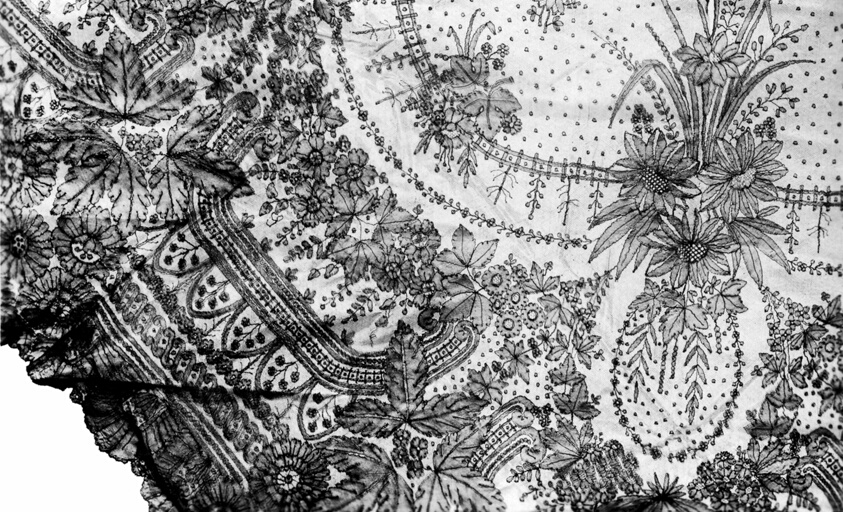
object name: Textile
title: Half Shawl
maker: France, probably Bayeux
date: 1855/65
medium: Silk, bobbin straight lace (made in vertical strip joined)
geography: France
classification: textile; lace - bobbin